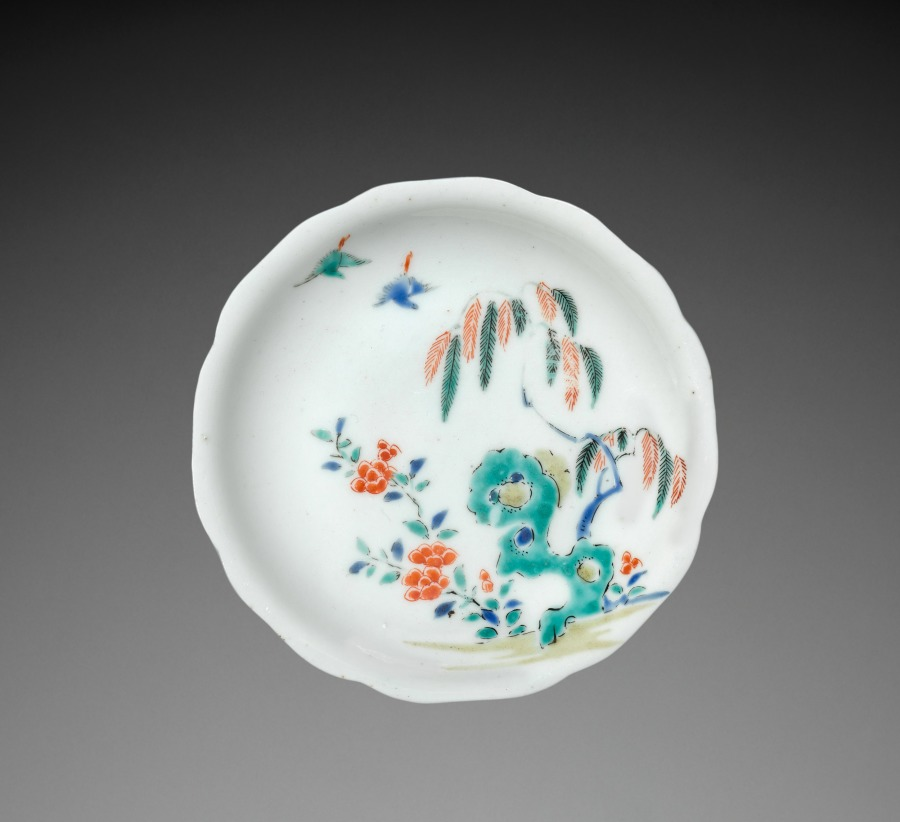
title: Dish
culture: Japan, Edo period (1615–1868)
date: 1700s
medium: porcelain with overglaze enamel decoration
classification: Ceramic